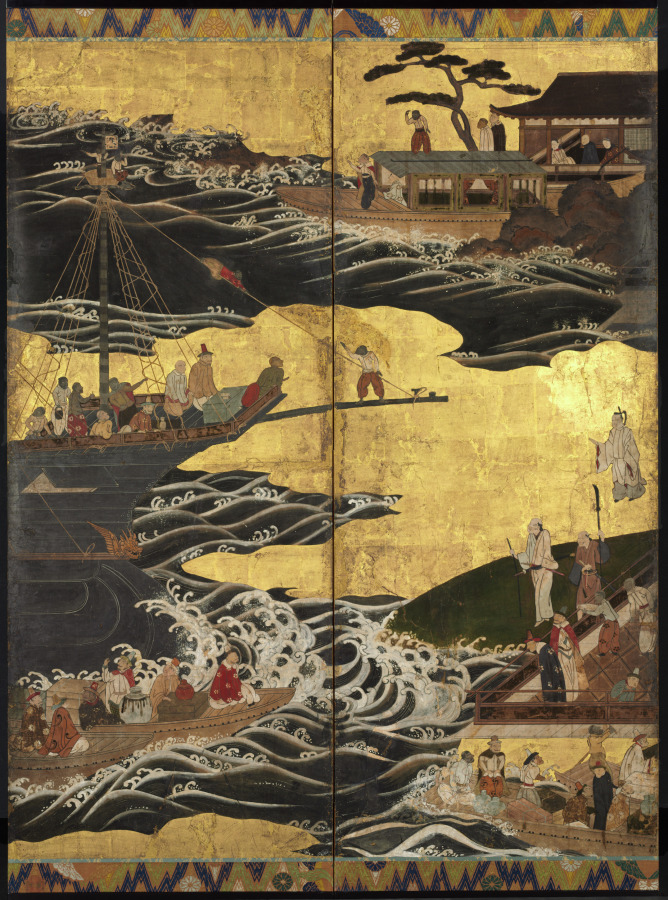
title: Arrival of the "Southern Barbarians"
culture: Japan, Momoyama period (1573–1615)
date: c. 1600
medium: One of a pair of six-panel folding screens; ink, color, and gold on paper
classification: Painting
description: This screen and its corresponding screen show Portuguese merchants arriving in Japan, having crossed the oceans in their large ship with a multinational crew. The Portuguese were known in Japan as the “Southern Barbarians” because they arrived from the south and their customs and manners were unfamiliar to the Japanese, who had not encountered anyone from Europe until their first appearance in 1543. In 1639, the Portuguese were forced out of Japan, mainly owing to internal difficulties caused by their Catholic missionaries, but they were a major conduit for both objects and ideas from Europe for nearly 100 years.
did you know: Europeans were called "Southern Barbarians" because their ships arrived in Japan from the south.